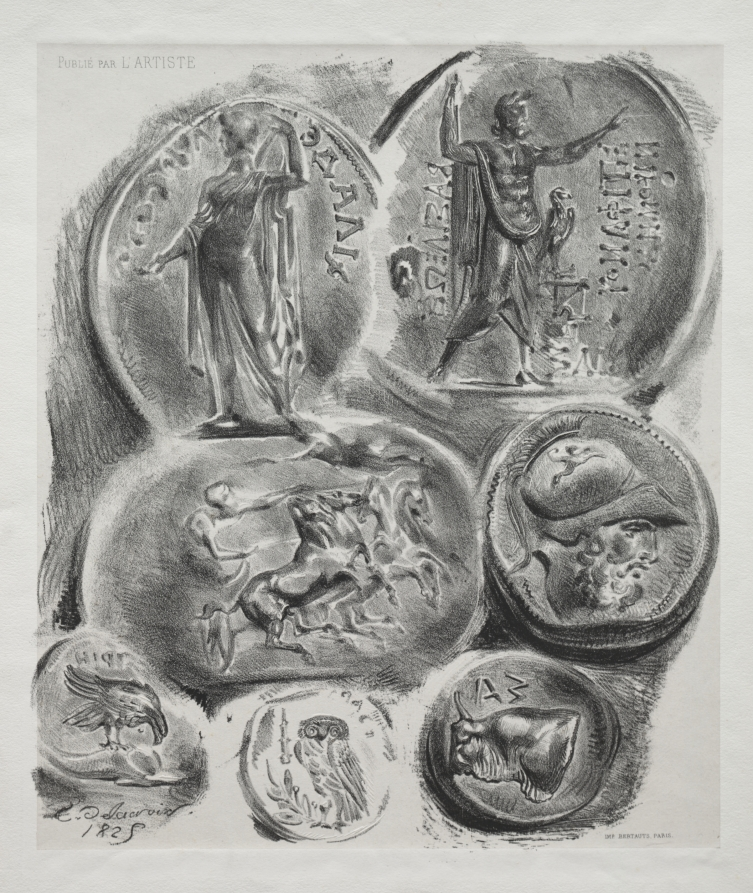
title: Sheet with Seven Antique Medals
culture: France, 19th century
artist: Eugène Delacroix (French, 1798–1863)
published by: L'Artiste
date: 1825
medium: lithograph with chine collé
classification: Print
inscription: signed and dated, lower left, in stone: E. Delacroix 1825; upper right, printed: Publié par L'Artiste; lower right, printed: Imp. Bertauts, Paris